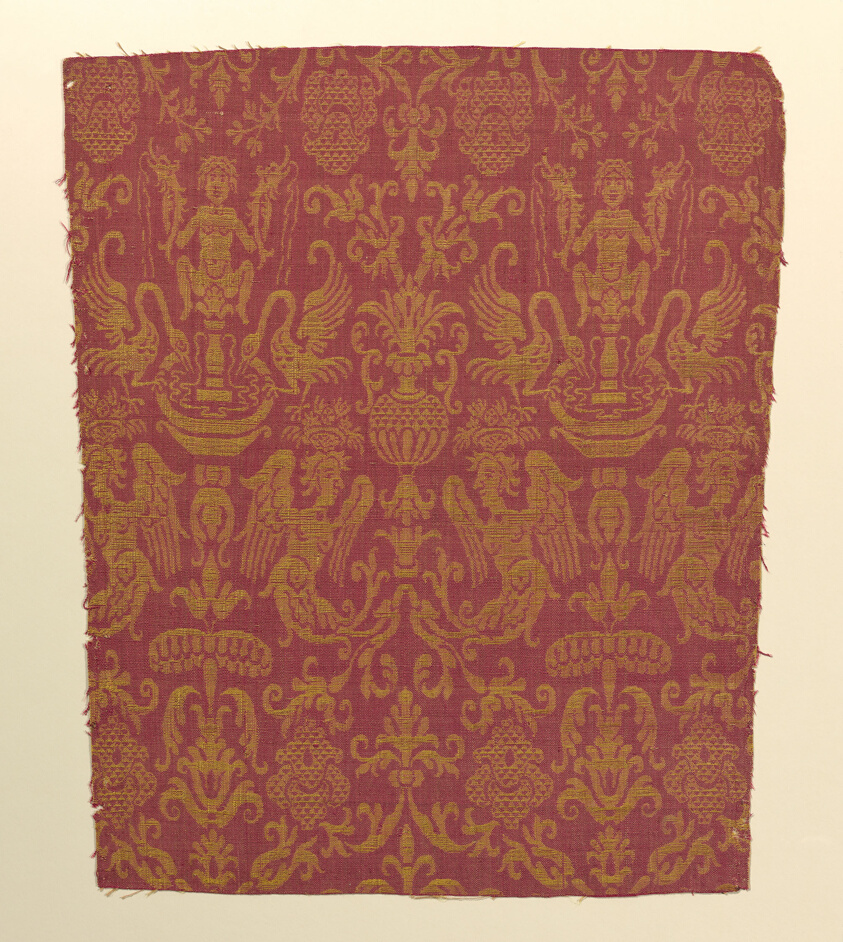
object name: Textile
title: Fragment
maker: Italy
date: 17th century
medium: Silk and linen, plain weave with supplementary patterning wefts bound by secondary binding warps in plain interlacings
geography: Italy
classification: textile; weaving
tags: flowers, medallions, swans, fountains